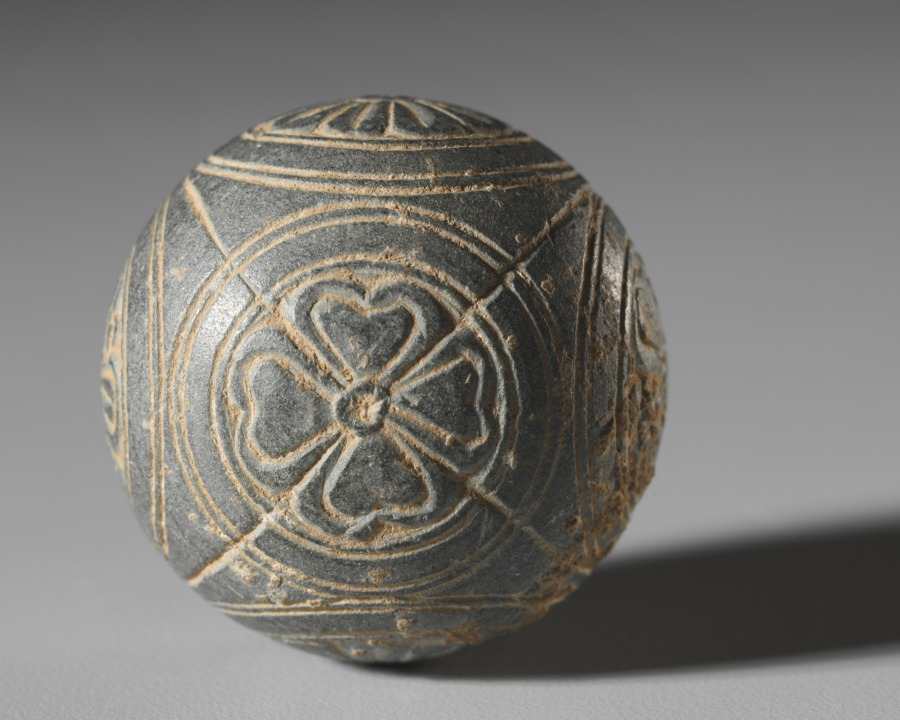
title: Miniature Stone Reliquary or Toilette Casket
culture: Pakistan, Gandhara, probably Sirkap, early Kushan period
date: 1–100 CE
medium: gray schist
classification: Sculpture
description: Tiny reliquaries holding the cremated remains of the Buddha or a high-ranking holy person empowered monuments and made them sacred. A Buddhist monument, such as the solid hemispherical mounds called stupas, would not be worshipped until it was consecrated with the relic secreted inside. Bits of ash were combined with tiny gems inside a crystal or glass reliquary, which was then placed inside a stone or metal container, like the lidded versions seen here. These containers look like cosmetic vessels for aromatic pastes used for perfume in ancient India. Buddhist texts state that the enlightened Buddha emitted a fragrance like sandalwood paste; the form of the reliquary as a perfume bottle indicates the presence of the Buddha by the visual reference to his pleasant scent. Once enclosed in the stupa the reliquaries would not be seen, but monks were tasked with applying sandalwood paste to the exterior of stupas as part of their regular maintenance to convey to visitors the ongoing presence of the Buddha radiating from the relic in the center.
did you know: The knob of the lid is gilded, as is the interior of the casket.